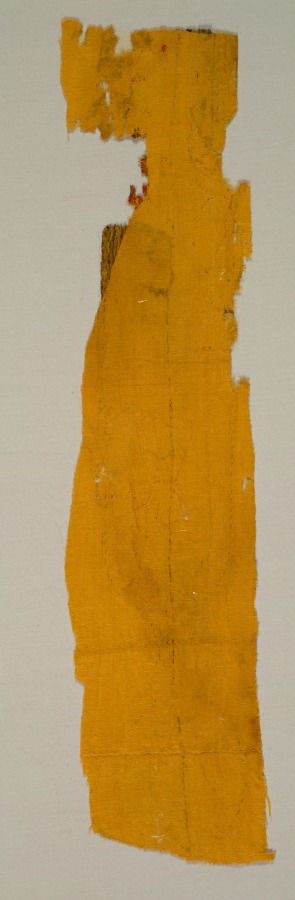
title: Clavi (Decorative Band)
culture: Egypt, Umayyad period (661–750) or Abbasid period (750–1258)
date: 700s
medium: wool; plain weave with slit-tapestry weave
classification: Textile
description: Figures and winged animals from ancient Greece and Rome remained popular during the early Islamic period of the Umayyad and Abbasid dynasties. The naked figure could represent Dionysus, the Greek god of wine; he holds his thyrsus, a staff decorated with ivy leaves and pinecones, while pouring liquid from a small jug for the panther. These colorful designs probably adorned the sleeve and front or back of a tunic, a garment worn directly on the body for over 1,000 years, from Roman antiquity to the Middle Ages. Popular decorations were regularly reused and sewn onto new tunics, as can be seen on this winter garment made of wool.